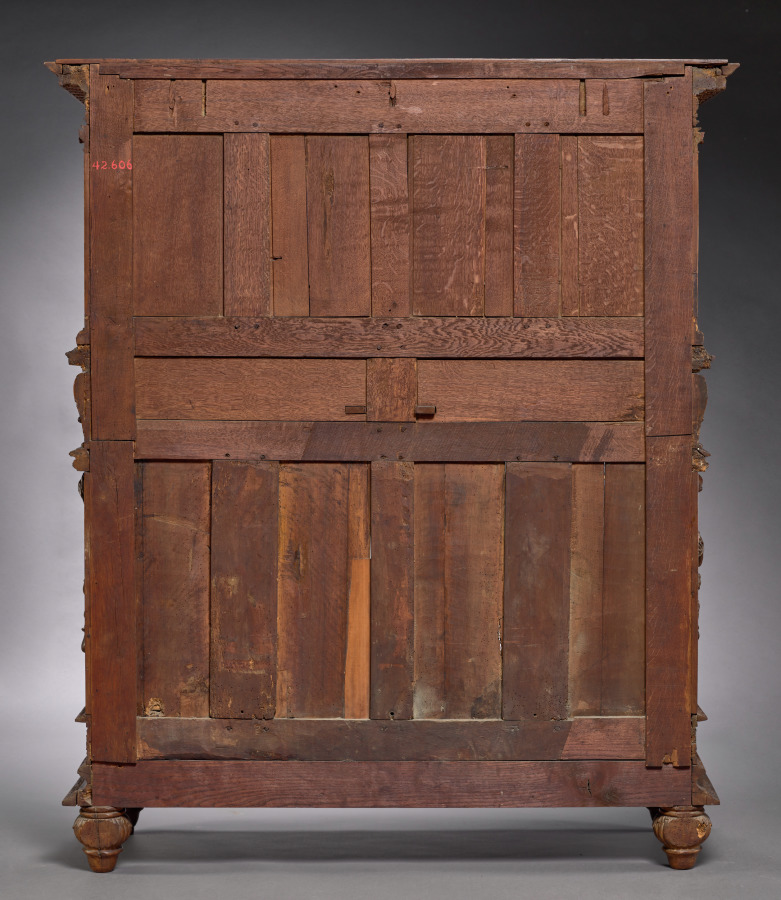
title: Dressoir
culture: France, Burgundy, 16th century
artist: style of Hugues Sambin (French, 1518–c. 1601)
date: mid 1500s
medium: walnut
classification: Furniture and woodwork